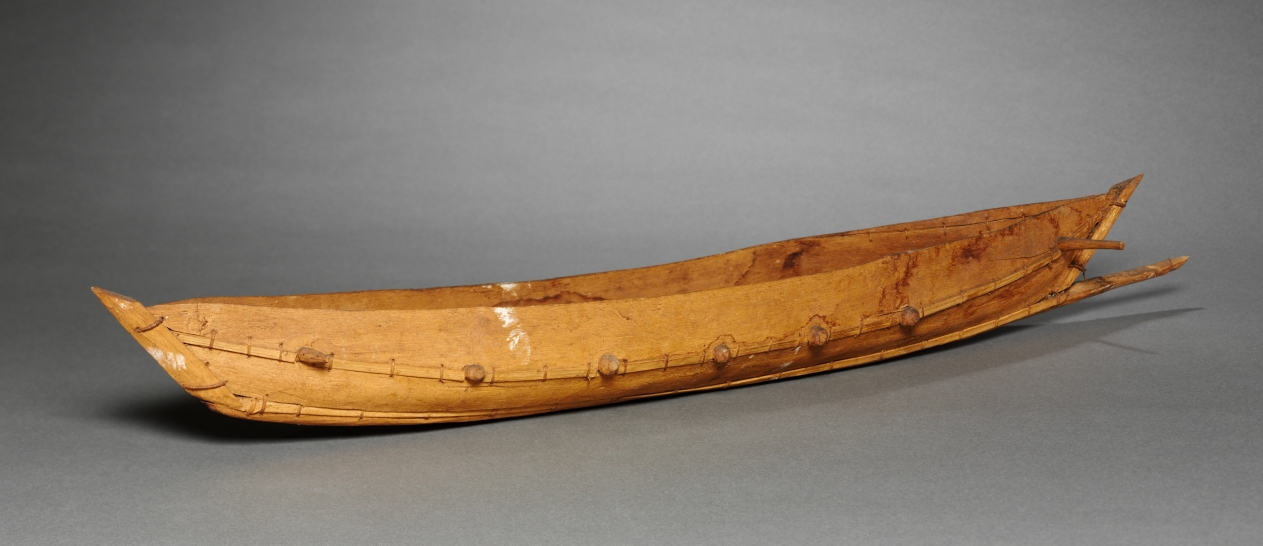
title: Model Canoe and Paddles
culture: Africa, East Africa, probably Uganda, unknown maker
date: 1900s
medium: wood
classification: Furniture and woodwork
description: Made of plain wood, this is a model of a canoe with a prow, seats, and five paddles. Composed of multiple panels sewn together with fibers, it was described in historical museum documents as a "war canoe." Similar examples from around the same period are found in American and European museums, where they had been collected in eastern, central, and western Africa as anthropological artifacts rather than as artworks. While the archives have little information about this object, it appears similar to Ugandan sewn plank canoes and to a model example collected in Uganda between 1890 and 1910 now at the British Museum.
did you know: The small scale and a 1929 description of this object as "modern" suggest it was made for tourists.